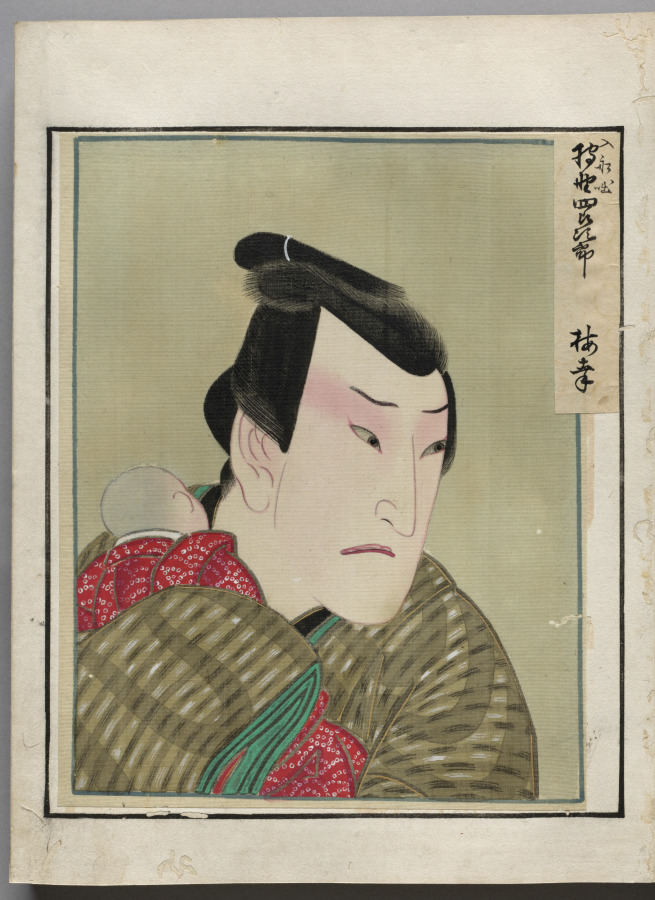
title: Double-Leaf from Album of Actor Portraits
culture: Japan, Edo period (1615–1868)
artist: Shōrakusai (Japanese)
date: c. 1790–1810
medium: double-leaf from an accordion-style album; ink on paper (right) and ink and color on silk (left)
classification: Bound Volume